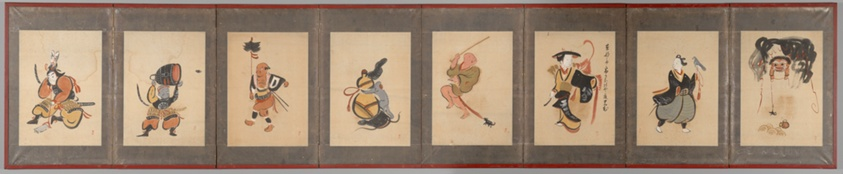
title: Otsu-e paintings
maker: Japanese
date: c.1850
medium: Eight-fold screen; ink and color on paper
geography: Japan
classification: screen; painting; asian art; print